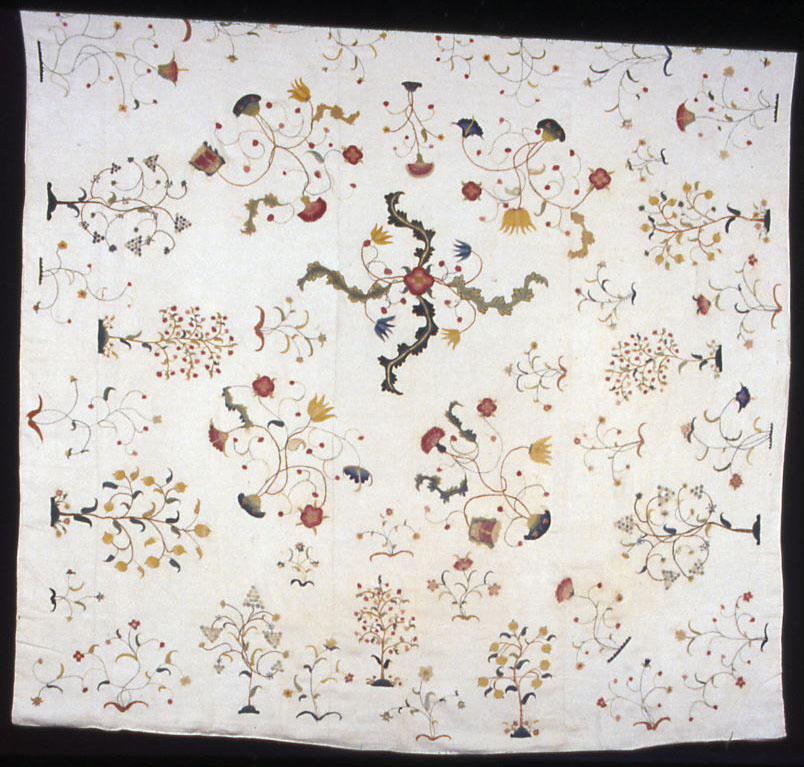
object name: Textile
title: Bedcover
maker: United States, possibly Connecticut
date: 1750/70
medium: Linen, plain weave; embroidered with wool in Romanian and stem stitches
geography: United States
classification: textile; needlework (visual works); needlework - quilt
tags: foliage, flowers